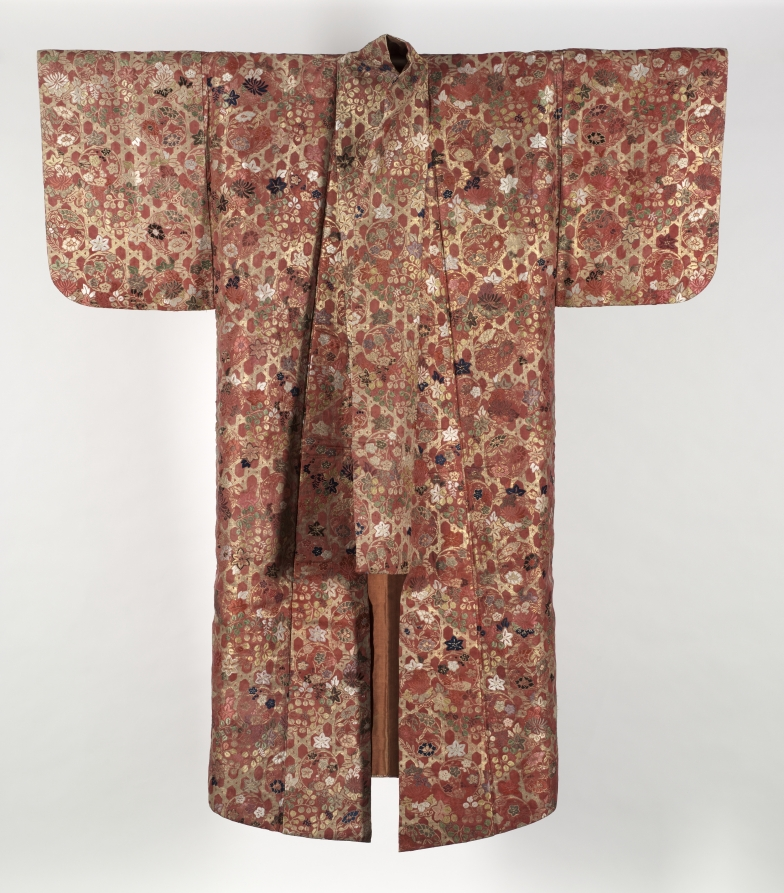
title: Noh Robe (Karaori)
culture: Japan, Edo period (1615–1868)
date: 1800–1850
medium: Brocaded silk with metal thread weft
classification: Garment